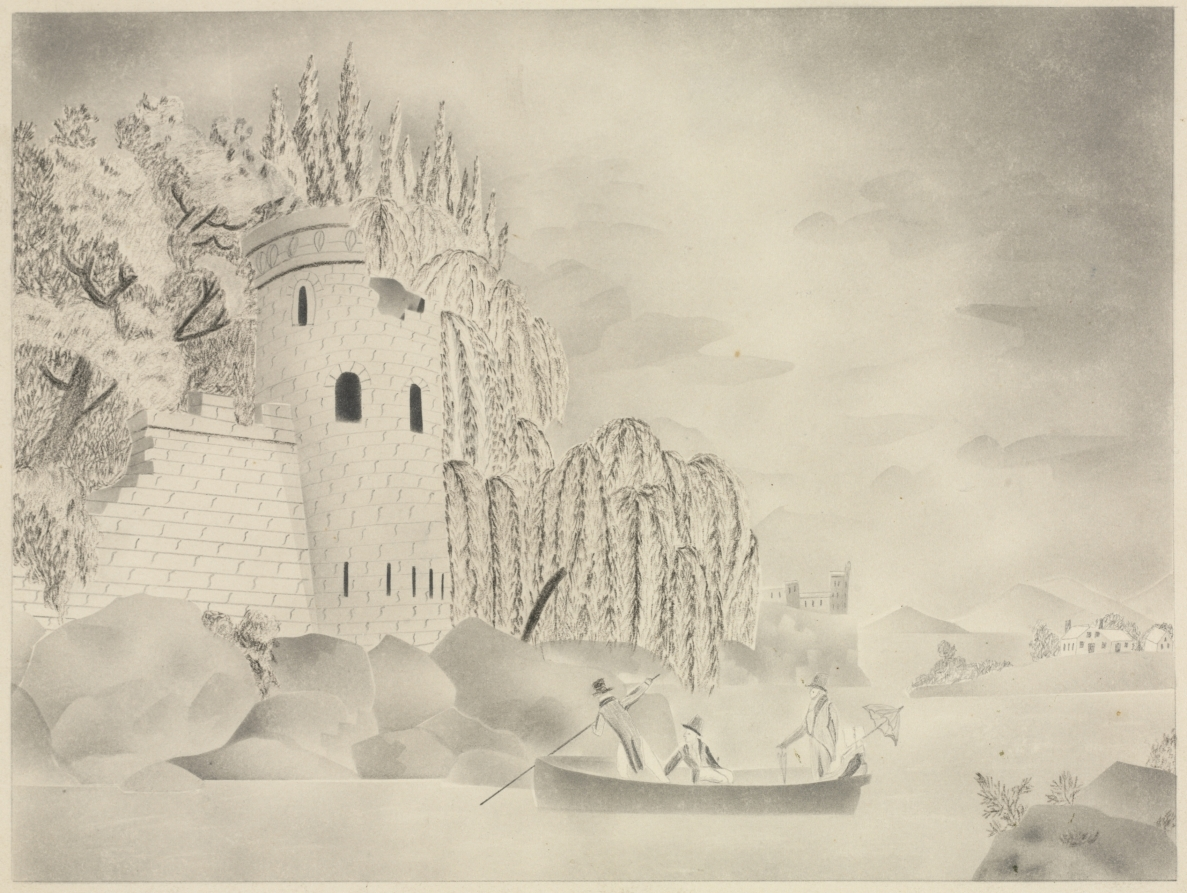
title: The Lonely Tower (Castle on a River with Willows and a Boat)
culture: America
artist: Mary Altha Nims (American, 1817–1907)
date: 1800s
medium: pencil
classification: Drawing